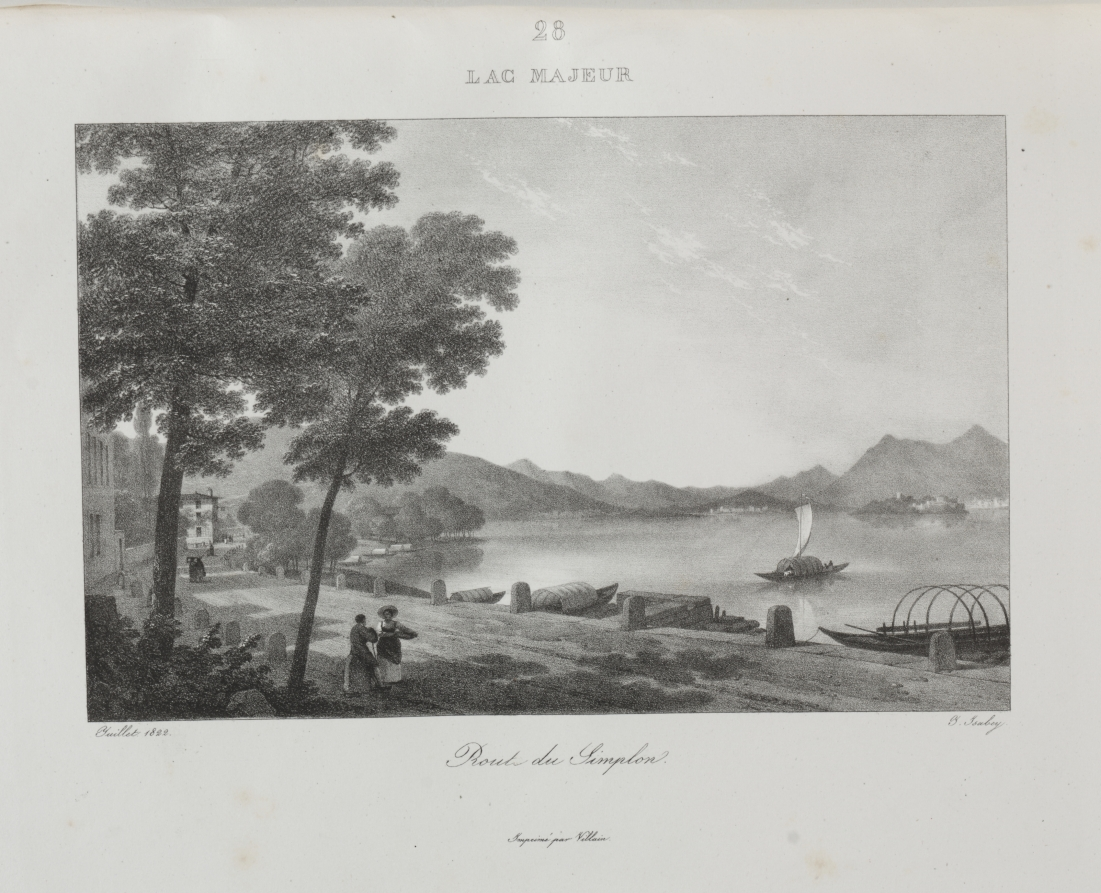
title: Voyage en Italie en 1822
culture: France, 19th century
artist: Jean-Baptiste Isabey (French, 1767–1855)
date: 1833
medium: lithograph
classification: Bound Volume